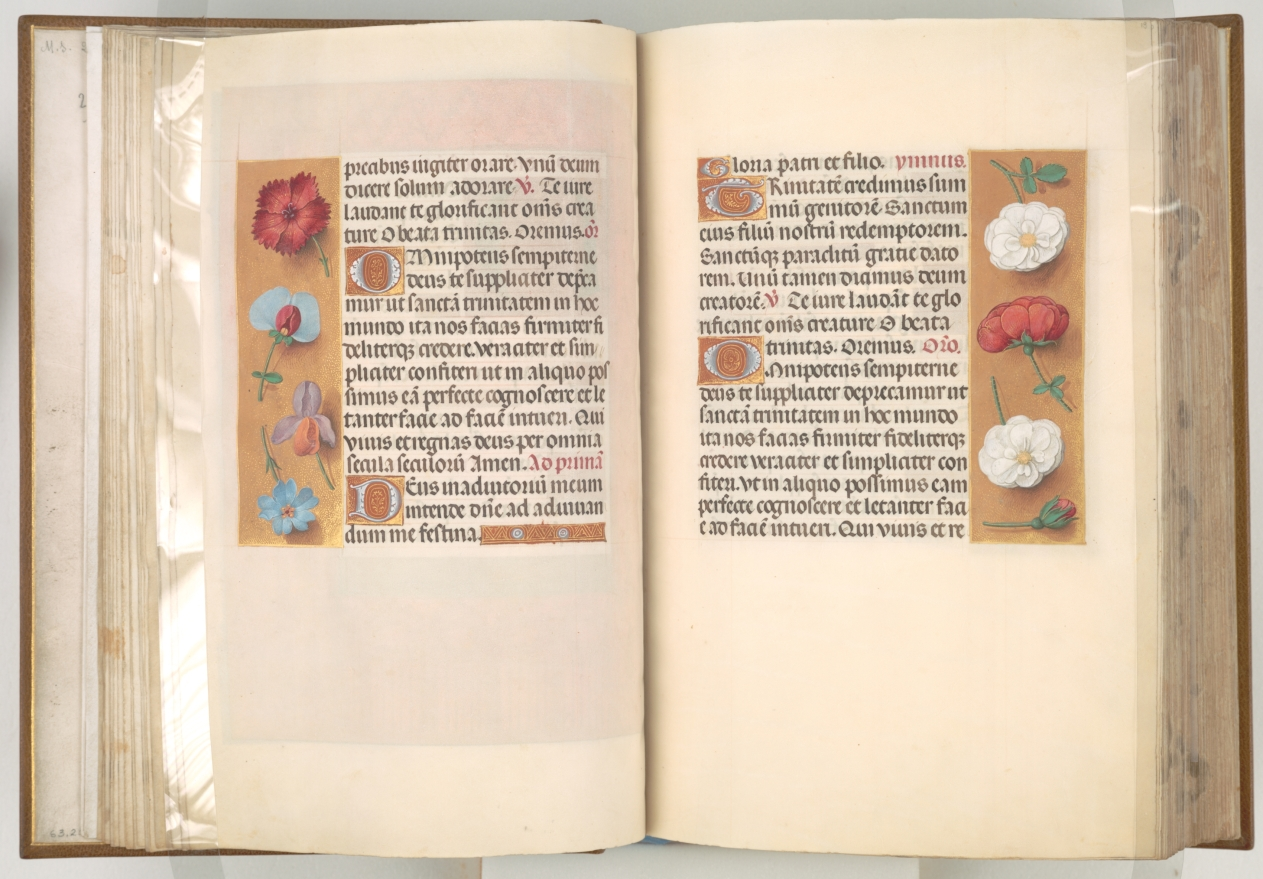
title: Hours of Queen Isabella the Catholic, Queen of Spain: Fol. 19r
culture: Flanders, Ghent and Bruges, late 15th century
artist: Master of the First Prayerbook of Maximillian (Flemish, c. 1444–1519)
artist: and Associates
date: c. 1500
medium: ink, tempera, and gold on vellum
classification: Bound Volume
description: This manuscript was illuminated by a circle of at least five highly organized manuscript painters active in the Flemish cities of Ghent and Bruges. The principal illuminator was Alexander Bening, who painted the majority of the book's miniatures. Manuscripts produced by this circle of artists are renowned for the decoration of their borders, which typically feature a rich variety of realistically-painted flowers, birds, and butterflies. This prayer book, called a book of hours, was intended not for a cleric, but for the private devotions of a lay person-in this case, Isabella the Catholic, Queen of Spain (1451-1504). Isabella's coat of arms embellishes the book's frontispiece. It is unlikely that the book was commissioned by the Queen herself; rather, she probably received it as a diplomatic gift from someone courting her patronage, perhaps Cardinal Francisco Jimenez de Cisneros. A Franciscan friar, Jimenez was dependent upon Isabella for his advancement, first to the post of Queen's confessor in 1492, and then to Archbishop of Toledo in 1495.